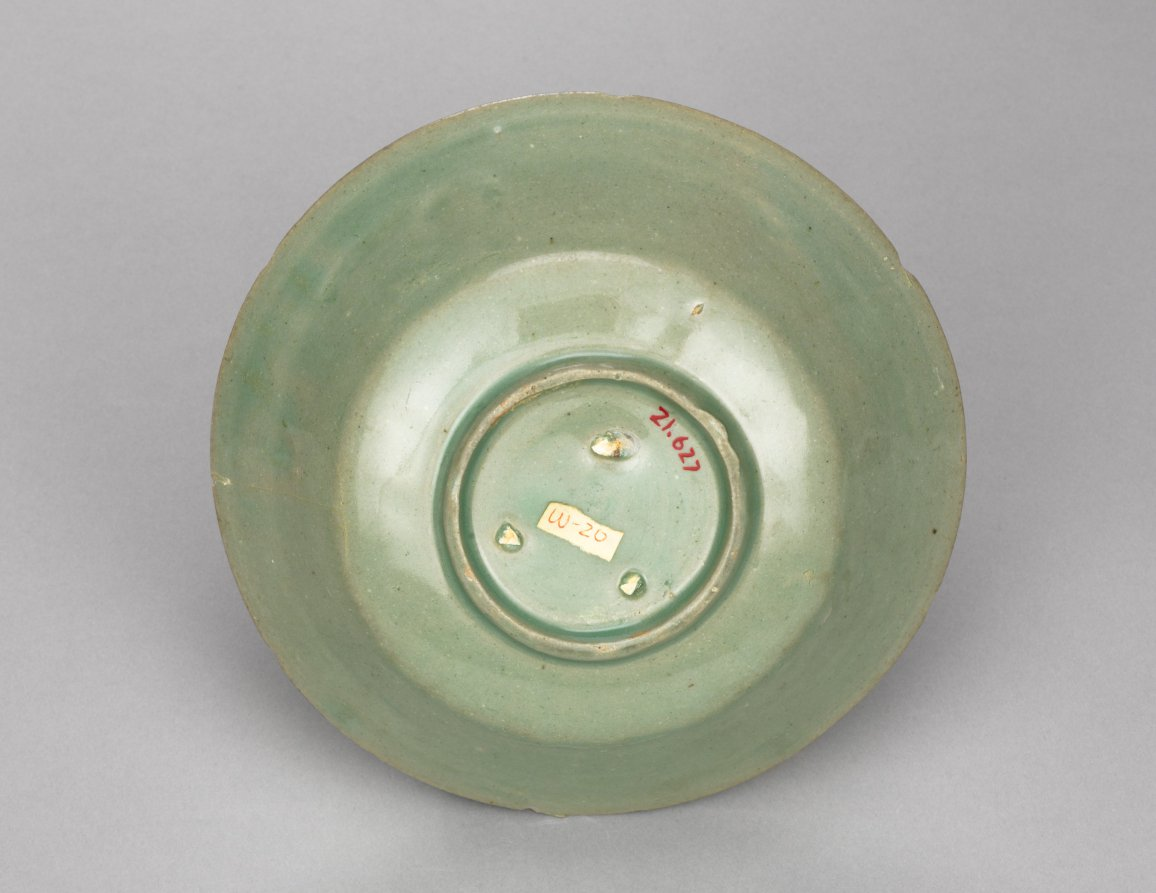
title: Dish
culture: Korea, Goryeo dynasty (918–1392)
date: 1100s-1200s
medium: pottery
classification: Ceramic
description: Celadons wares used for everyday such as this dish were among the most common burial objects in tombs during the Goryeo period (918–1392). Furnishing tombs with an elaborate assemblage of objects was believed to honor and comfort the newly dead. Generally, Goryeo tombs were left untouched until the late 1800s. During the colonial period (1910–45), however, Japanese archaeologists competitively excavated the tombs located in Kaeseong, the former capital of the Goryeo period, and soon began making tomb goods available for Japanese and Western collectors.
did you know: On the base of this dish, three spur marks made of bits of clay remain visible.